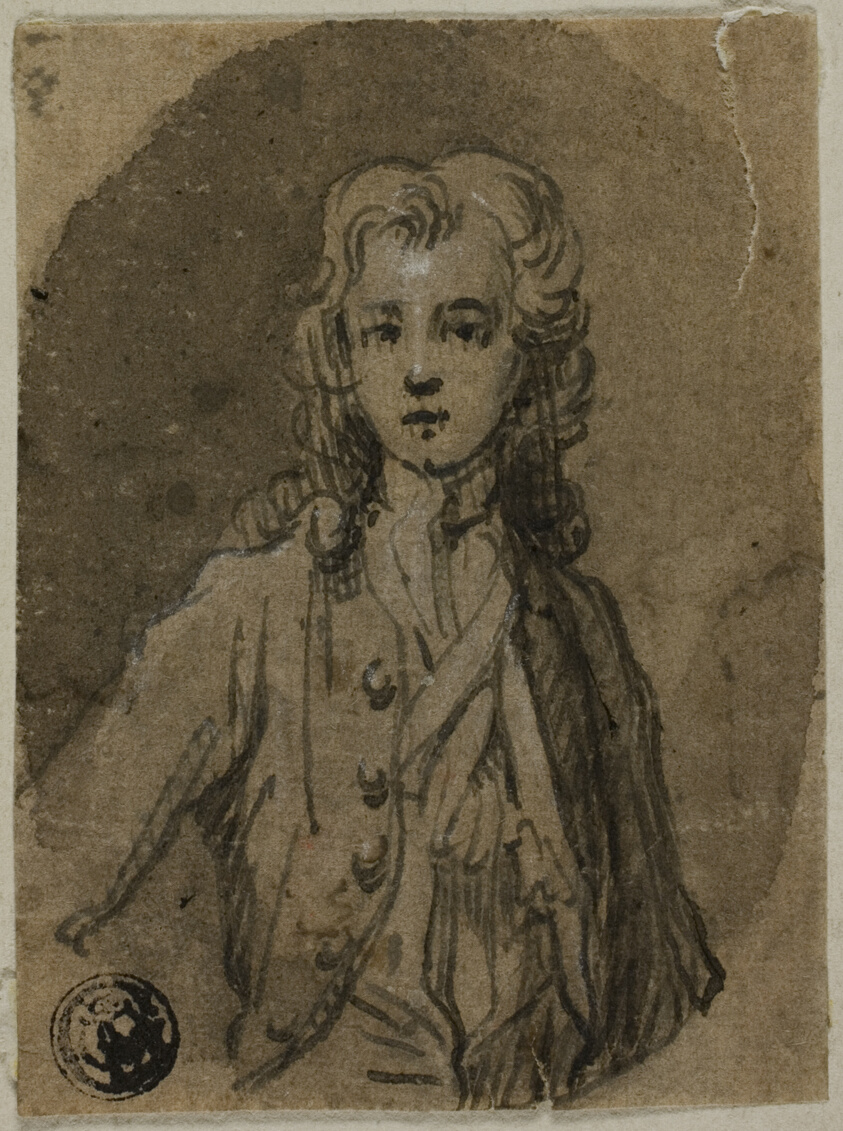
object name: Drawing and Watercolor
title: John, Son of First Duke of Lennon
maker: Possibly Sir Peter Lely or after; English, 1618-1680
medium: Pen and brown ink, with brush and gray wash, heightened with white gouache, over graphite, on tan laid paper, tipped on ivory laid paper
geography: England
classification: pen and ink drawings; drawings (visual works); prints and drawing